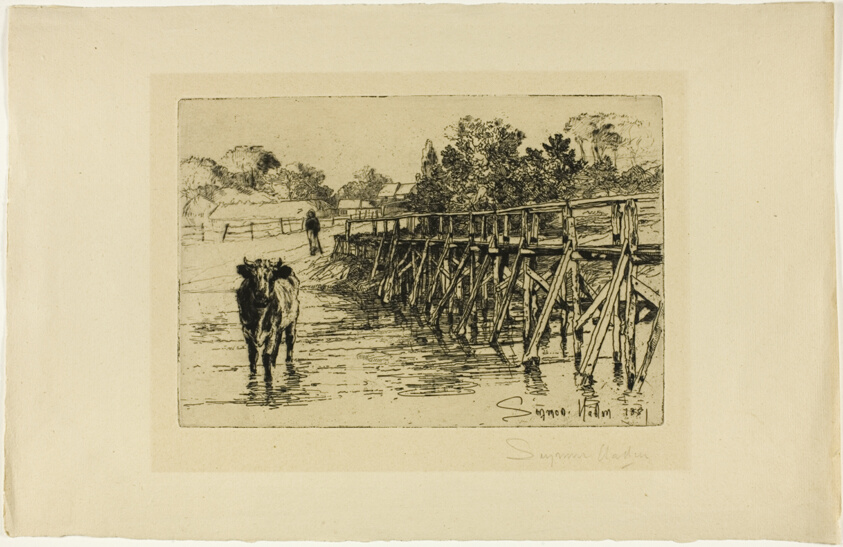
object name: Print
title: The Village Ford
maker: Francis Seymour Haden (English, 1818-1910)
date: 1881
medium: Etching with drypoint on cream laid paper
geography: England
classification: etching; print; prints and drawing